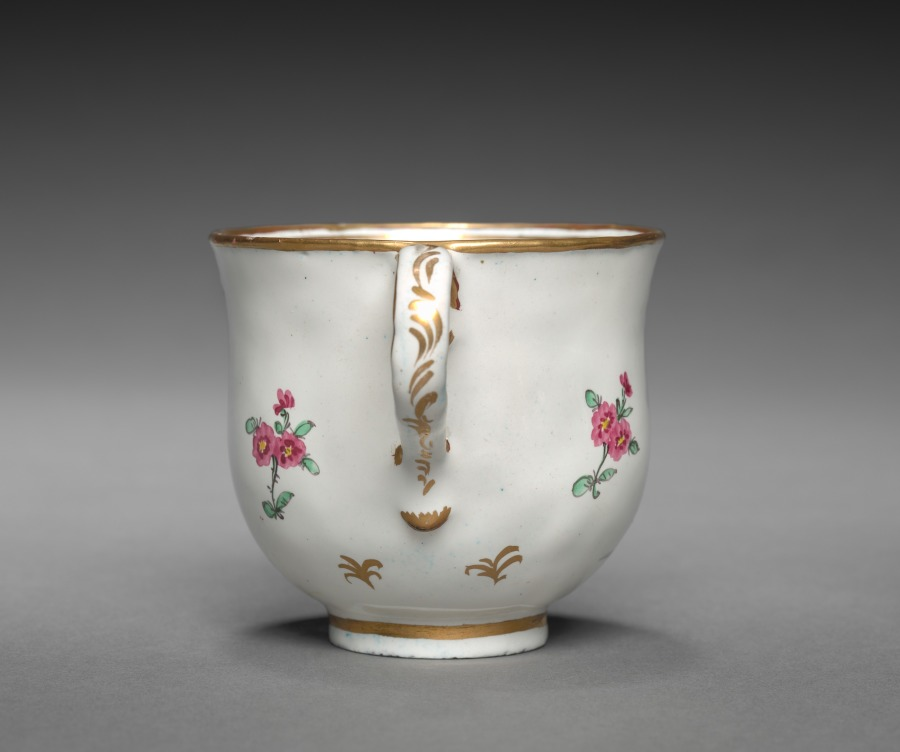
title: Cup and Saucer: Cup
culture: England, mid-18th Century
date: mid-18th century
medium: enamel on metal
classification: Enamel